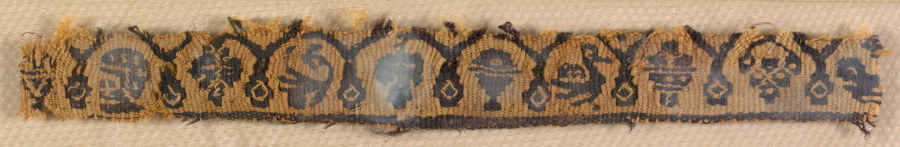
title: Fragment, Sleeve Ornament from a Tunic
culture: Egypt, Byzantine period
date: 500s - early 600s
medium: tapestry (probably originally inwoven in tabby ground); wool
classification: Textile